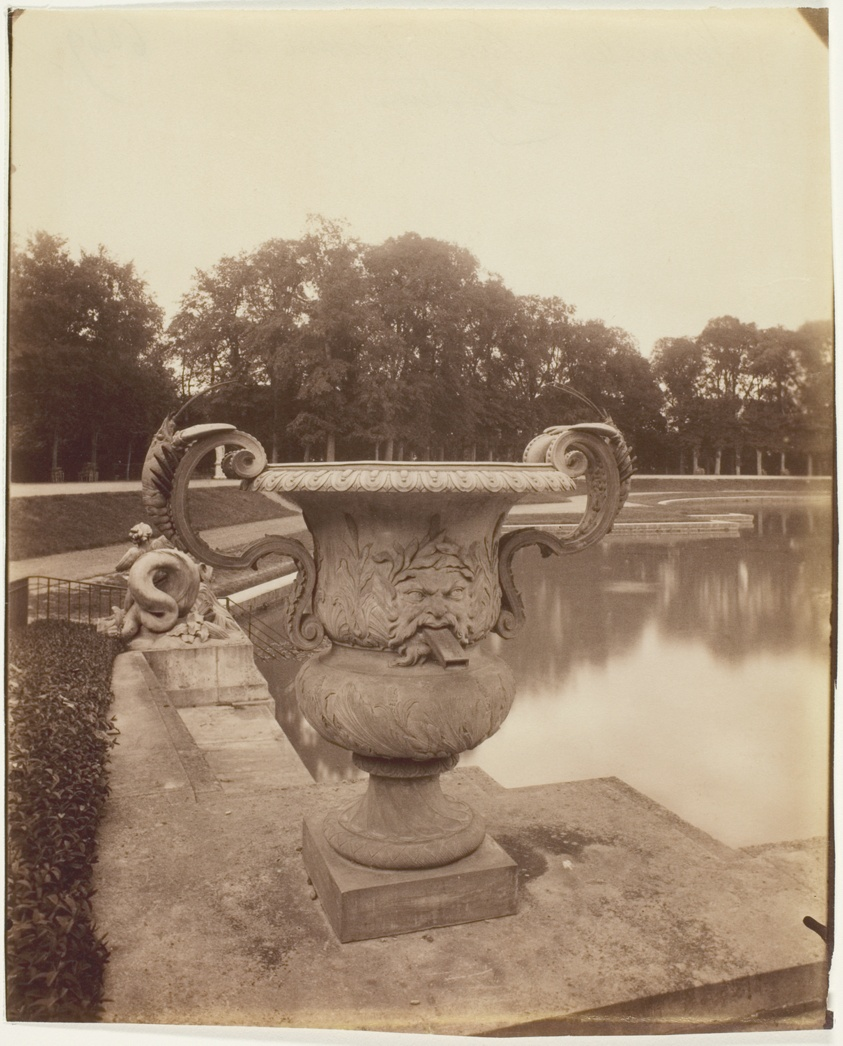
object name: Photograph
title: Versailles, Vase, Bassin de Neptune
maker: Jean-Eugène-Auguste Atget (French, 1857–1927)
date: 1901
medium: Albumen print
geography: France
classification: albumen silver print; photographic process; photography; photograph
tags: Collected by Hugh Edwards